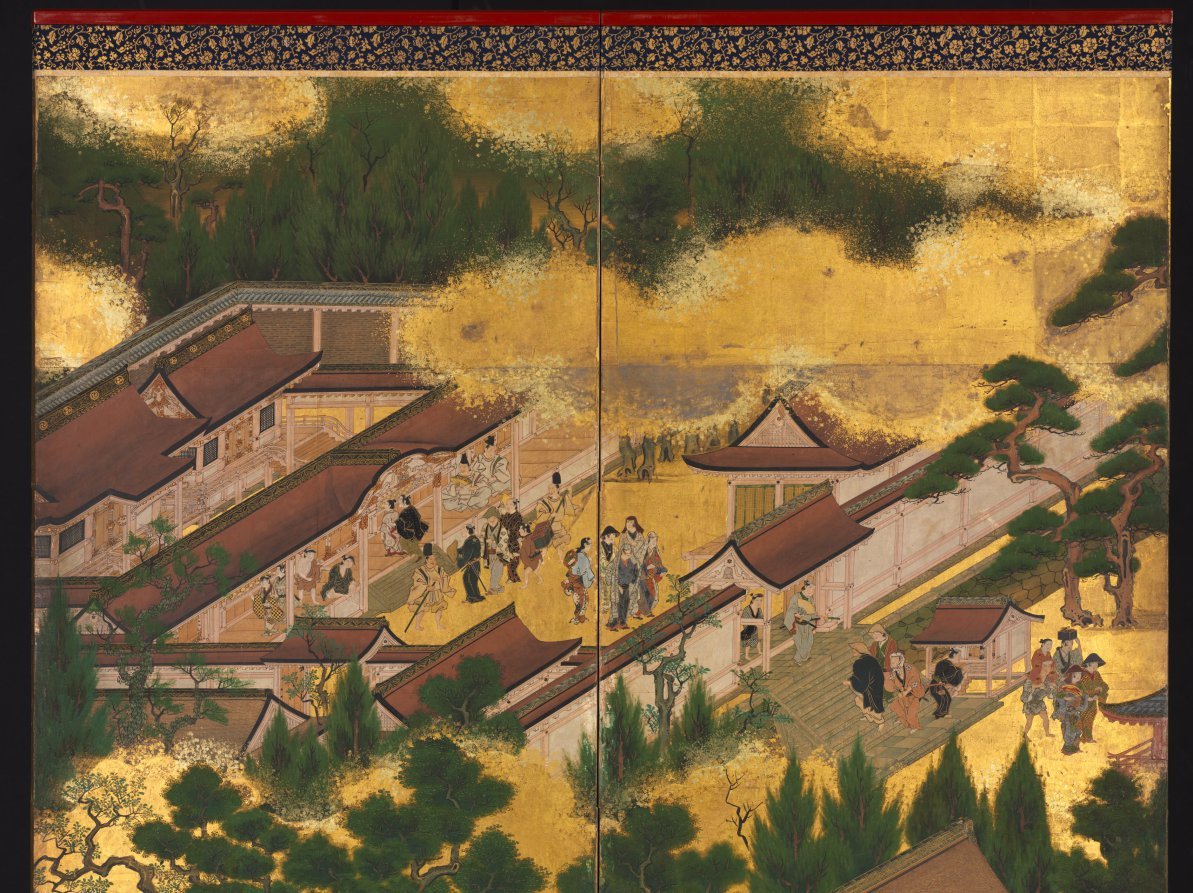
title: Horse Race at the Kamo Shrine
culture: Japan, Edo period (1615–1868)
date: early to mid-1600s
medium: One of a pair of six-panel folding screens; ink and color on gilded paper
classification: Painting